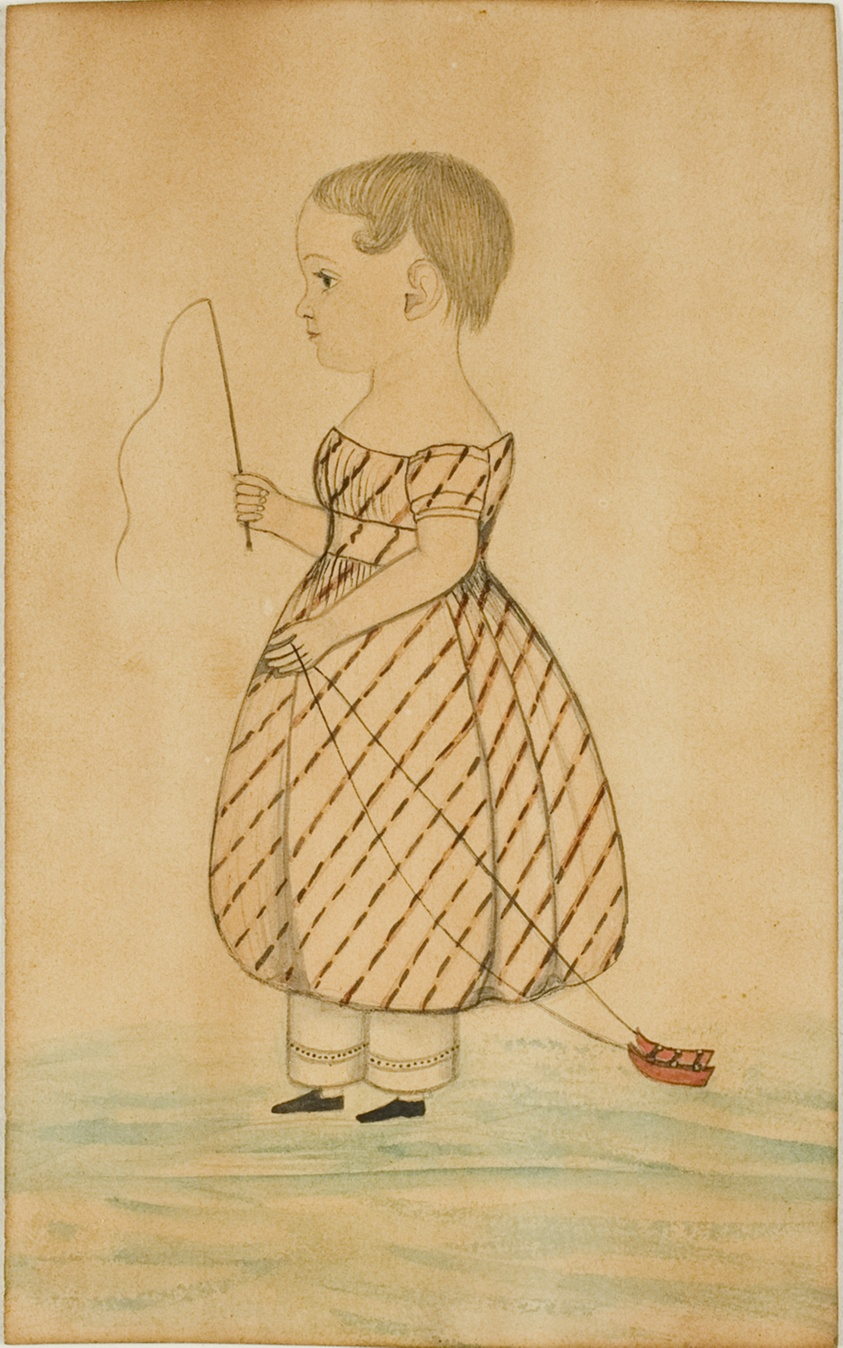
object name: Drawing and Watercolor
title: Standing Girl in Profile to Left with Whip and Toy Sleigh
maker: Unknown Artist; American or English, 19th century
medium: Graphite, pen and black ink, and watercolor, on cream wove paper (discolored)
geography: United States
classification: watercolor; drawings (visual works); prints and drawing